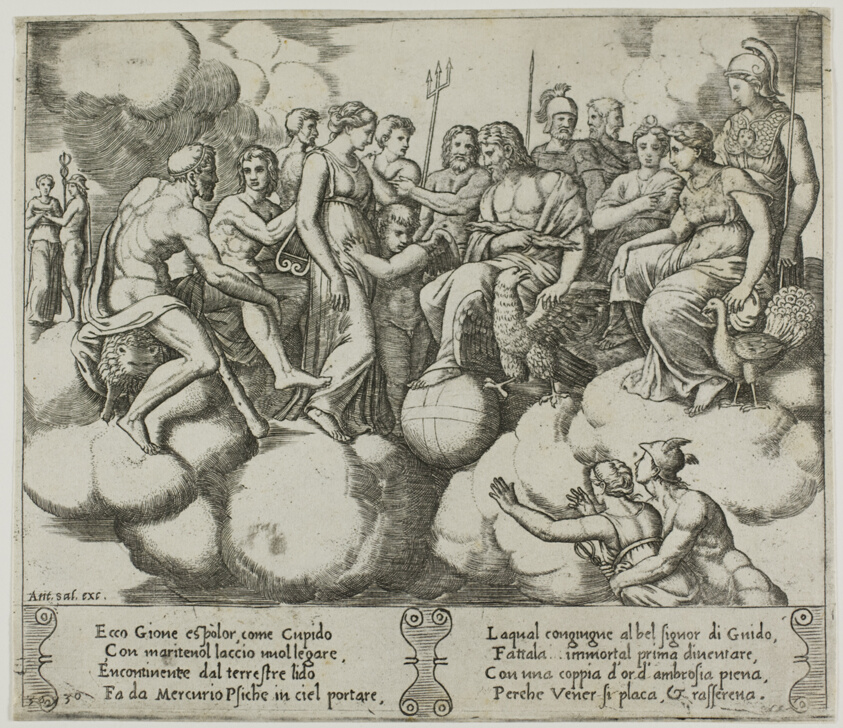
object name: Print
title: Venus and Cupid Pleading Their Cause in the Presence of Jupiter and Other Gods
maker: Master of the Die (Italian, active c. 1530-1560); after Michiel Coxcie I (Flemish, 1499-1592); in turn, inspired by Raffaello Sanzio, called Raphael (Italian, 1483-1520)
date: 1530/40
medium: Engraving in warm brown ink on ivory laid paper, backed with tissue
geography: Italy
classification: engraving; print; prints and drawing